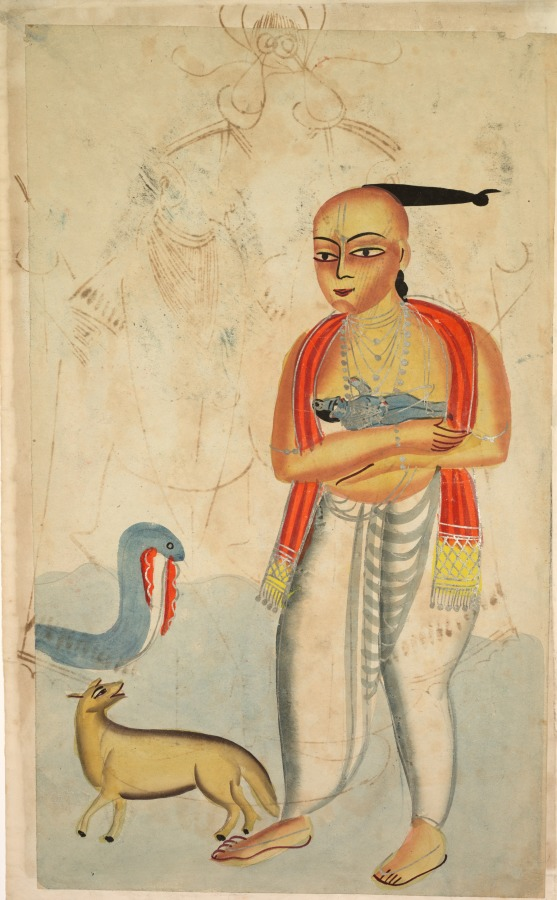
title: Vasudeva (Krishna's Father) Fleeing with Krishna Encounters a Cobra and a Jackal (verso), from a Kalighat album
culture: Eastern India, Bengal, Kolkata, Kalighat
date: c. 1890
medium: Gum tempera, graphite, ink, and tin on paper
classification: Painting